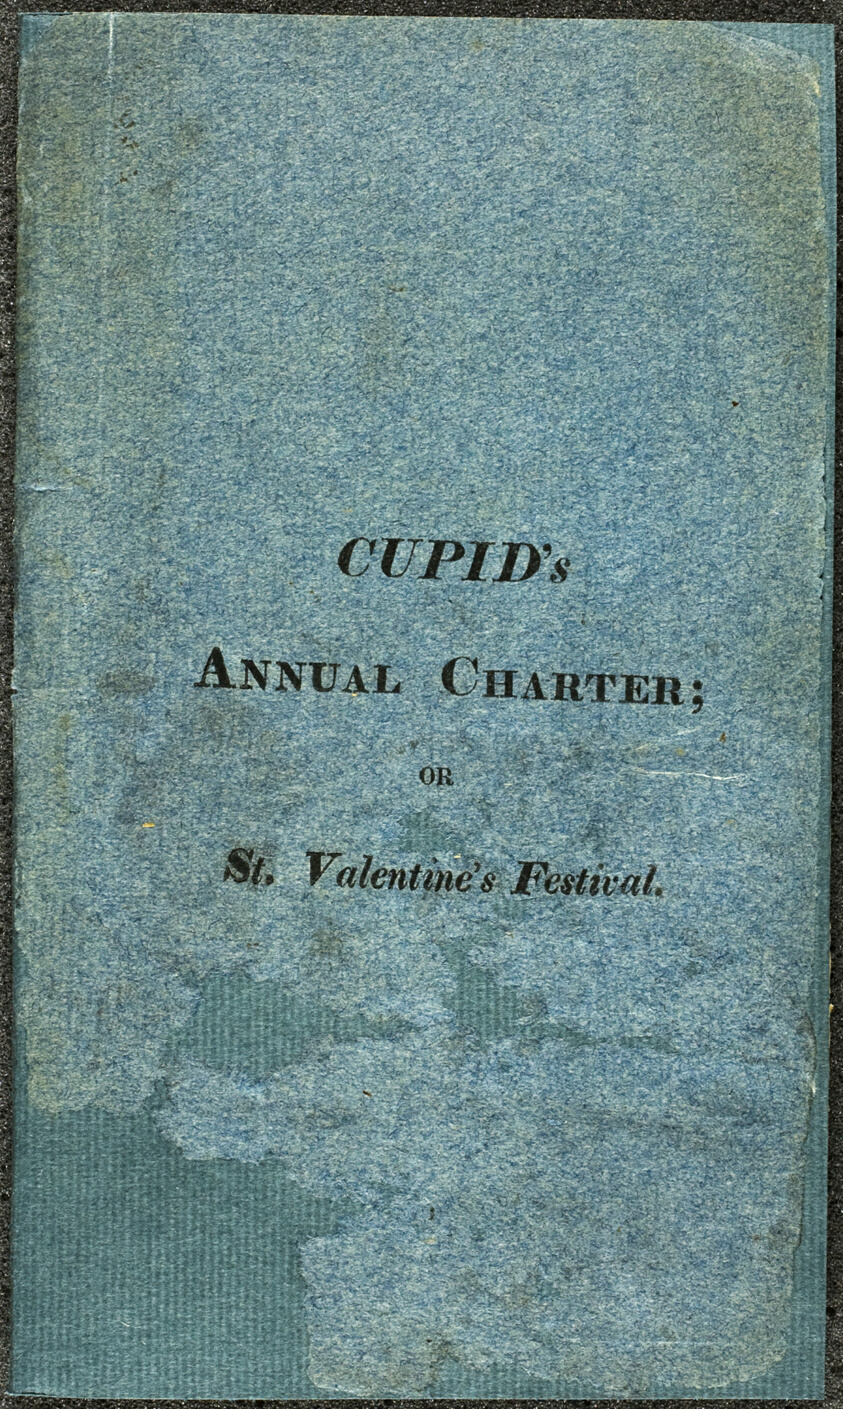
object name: Book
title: Cupid's Annual Charter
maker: Unknown Artist (English, 19th century); published by W. Perks (English, 19th century)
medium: Book containing one lithograph with hand-coloring and text on nine sheets of off-white laid paper, with a cover of blue laid paper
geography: England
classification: book; prints and drawing